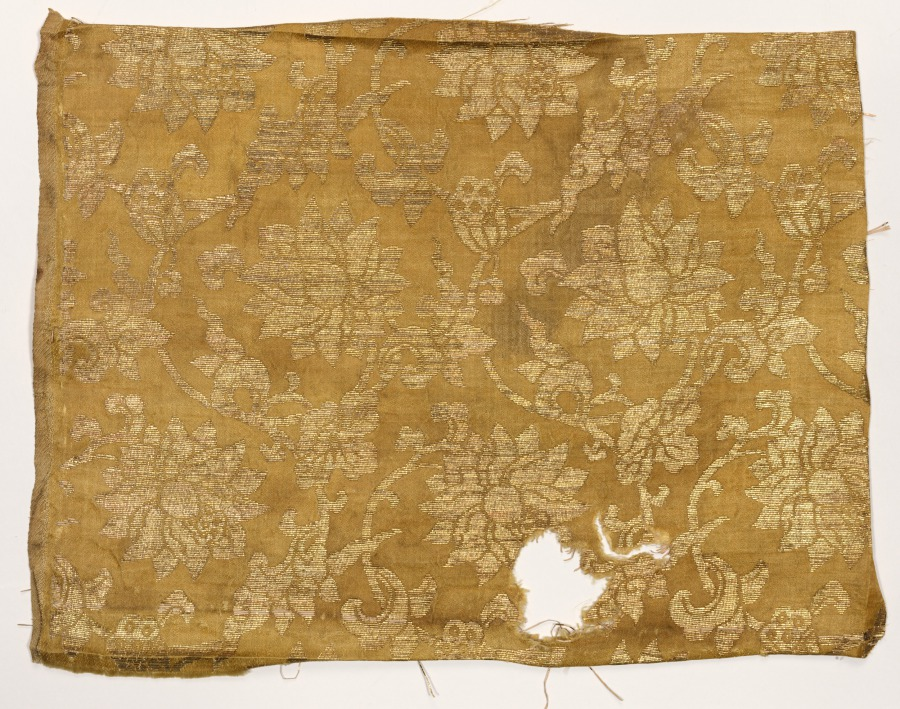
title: Textile Fragment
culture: Japan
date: 1800s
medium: Compound weave: silk and metal thread weft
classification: Textile